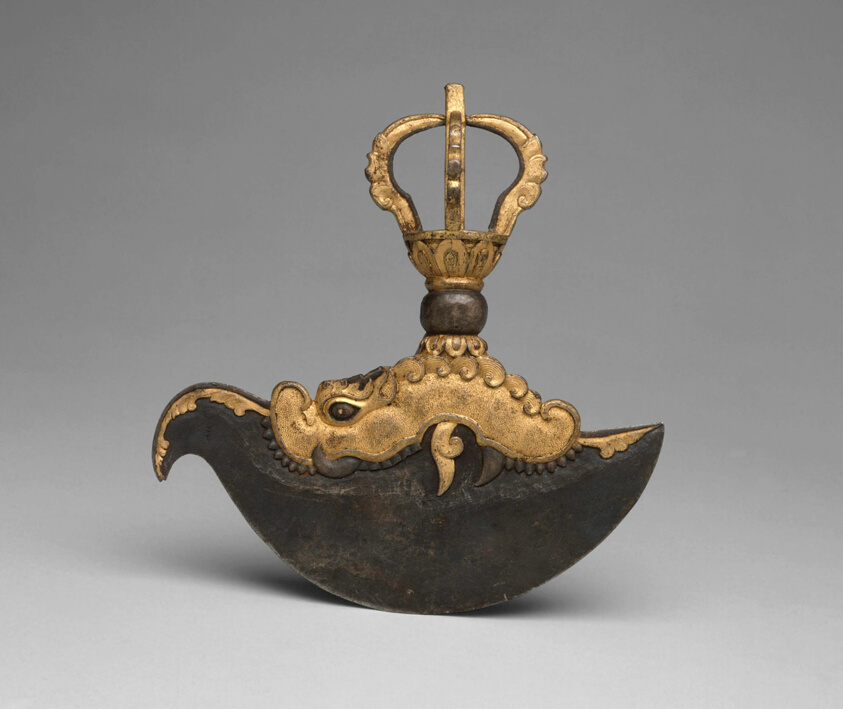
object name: Religious/Ritual Object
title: Ritual Flaying Knife (Kartrika)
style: Himalayan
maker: Tibet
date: 17th/18th century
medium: Gilt iron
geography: Tibet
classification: ceremonial object; asian art; ritual objects